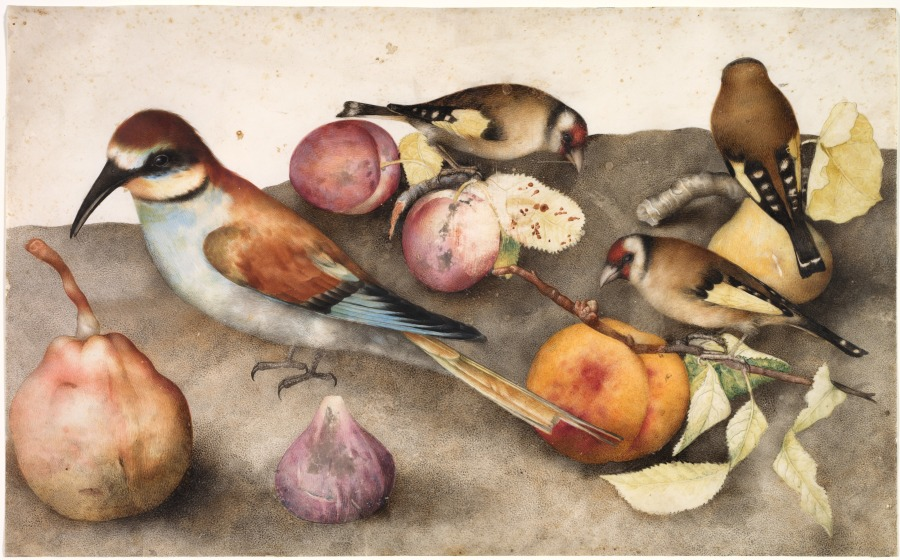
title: Still Life with Birds and Fruit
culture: Italy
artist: Giovanna Garzoni (Italian, 1600–1670)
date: c. 1650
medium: watercolor with graphite, heightened with lead white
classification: Drawing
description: Garzoni was one of the few women artists to achieve prominence in Italy during the 1600s. She garnered fame with her naturalistic still lifes on vellum, which combined scientific accuracy with sensitive artistry. Here, three small goldfinches on fruit branches and a larger bee-eater are dispersed across an earth-toned ground. The goldfinches sit on branches from which hang two plums (left), a peach (center), and a pear (right). A yellow quince and purple fig appear in the left foreground. Garzoni’s refined interpretations of the natural world suited the taste of aristocratic patrons like the Medici family, who acquired her drawings to decorate their villas.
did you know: Giovanna Garzoni was one of just a few women artists to rise to prominence in Italy in the 1600s.